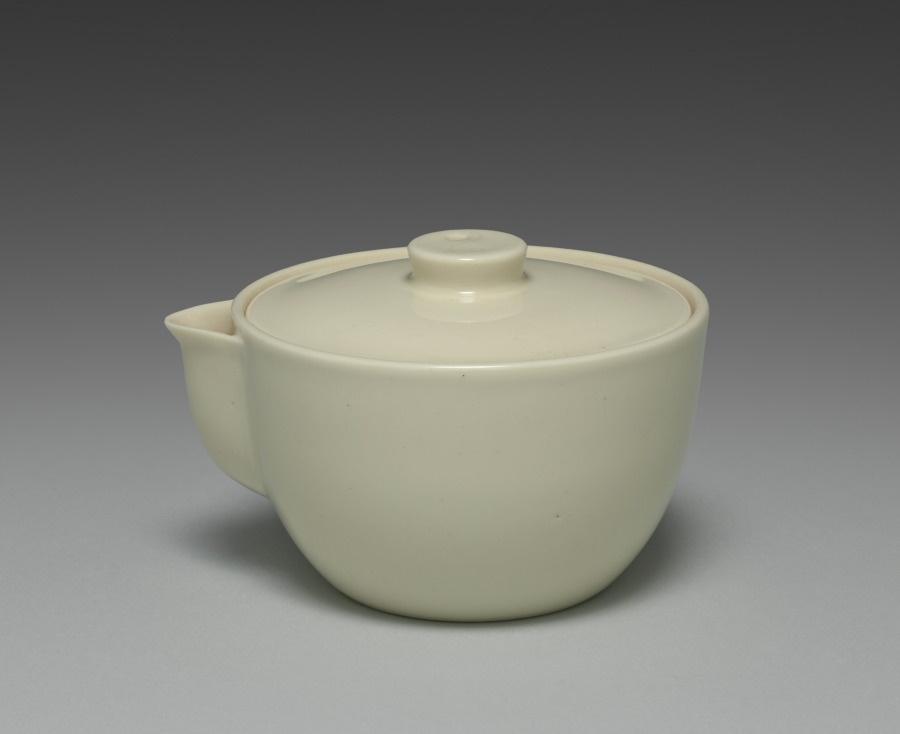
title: Hand-held Teapot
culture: Japan, Meiji period (1868–1912)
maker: Seifū Yohei III (Japanese, 1851–1914)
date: 1893–1914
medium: Porcelain with molded and carved design and cream glaze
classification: Ceramic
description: This teapot is of a variety used by advanced sencha practitioners. Called a hōhin, the pot is designed to be held directly by the fingers, with the body touching the upper part of the palm. This shape allows the host to manipulate the pot with a single hand and demonstrate dexterity. Direct contact between the ceramic body and the hand allows the host to closely gauge the temperature of the water within. There are differing grades of sencha, and for the finest one, gyokuro, the water temperature must be carefully regulated to achieve the proper flavor. This vessel is therefore efficacious for preparing this high-quality tea. The hōhin is also extremely portable, so it is well suited for impromptu gatherings. According to its box, this teapot is an example of taihakuji. “Great-white porcelain” was an important early invention Yohei III devised in 1972. It involved the combination of a distinctive translucent, creamy glaze over an ivory-colored clay body.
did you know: This pot’s restrained design includes on the lid’s handle a yin-yang motif, symbolizing the ideal balance between the forces of the universe.